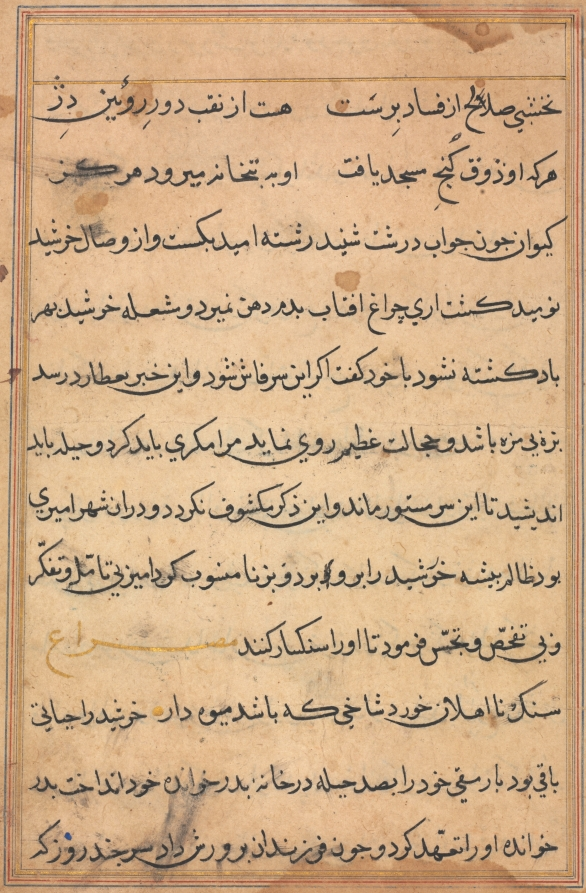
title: Page from Tales of a Parrot (Tuti-nama): text page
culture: Mughal India, court of Akbar (reigned 1556–1605)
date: c. 1560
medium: gum tempera, ink, and gold on paper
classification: Painting